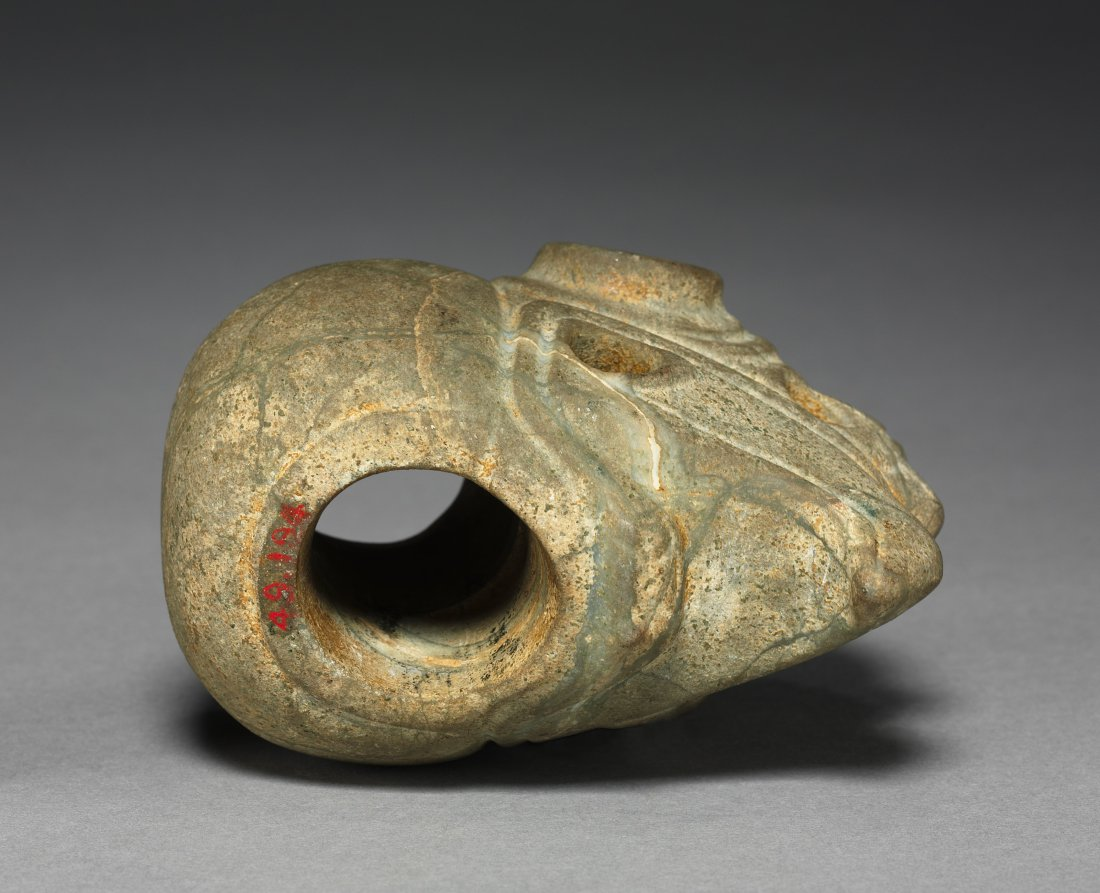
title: Ceremonial Mace (Club) Head: Bird (Male Curassow?)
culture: Costa Rica, Southern Nicoya region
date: 300 BCE–600 CE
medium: stone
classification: Sculpture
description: Probably once mounted on wooden shafts, these objects could have served as symbols of chiefly authority, group insignia, the heads of ceremonial weapons, or all three. They eventually were placed in elite graves. The bird may be a male curassow and the feline, a jaguar.